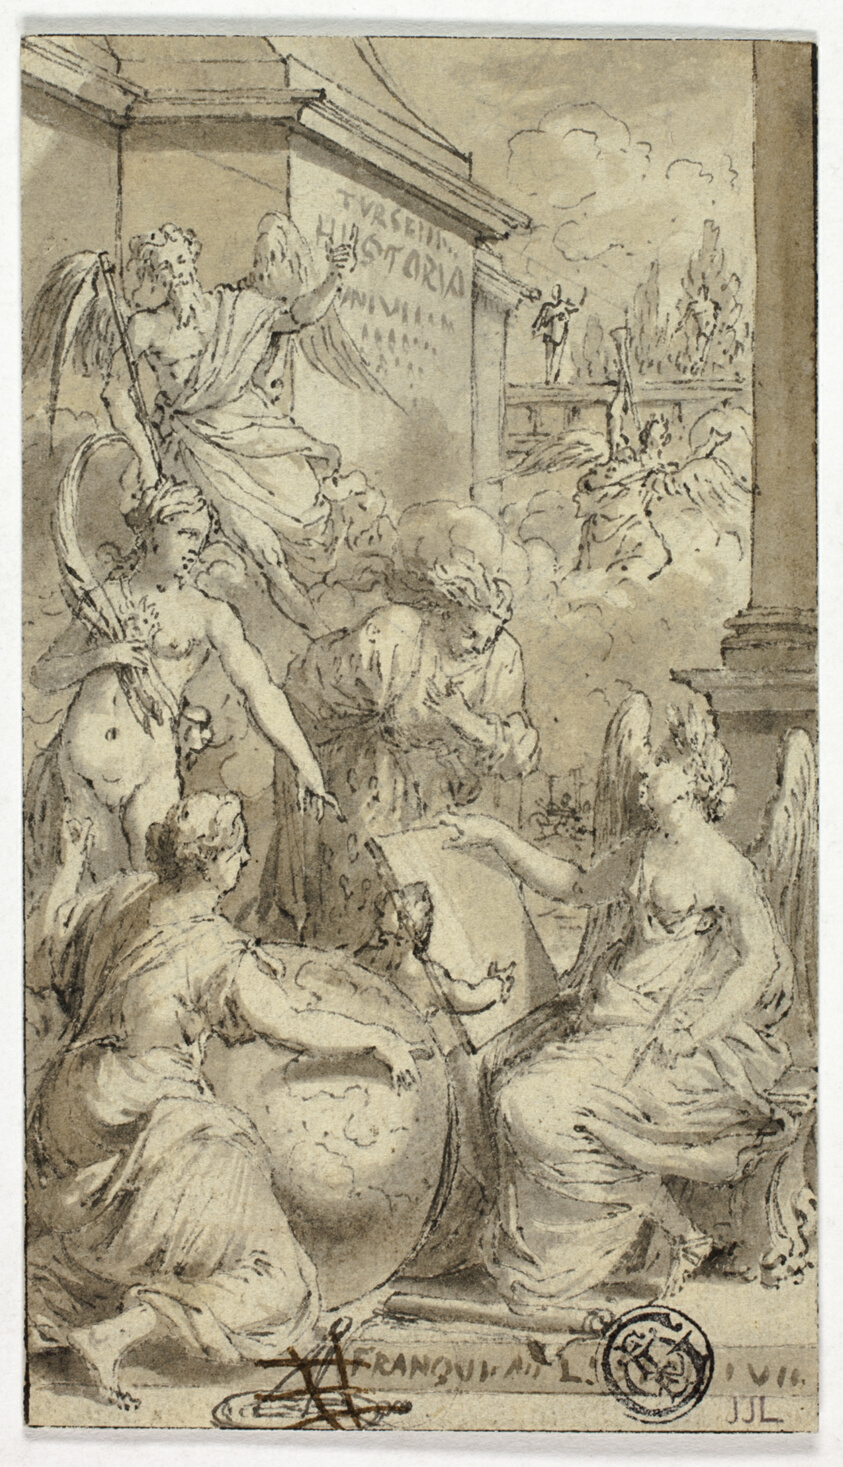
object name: Drawing and Watercolor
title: Allegory of History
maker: Unknown Artist; French or Dutch, 1700-1799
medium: Pen and black ink with brush and brown wash, over traces of graphite, on ivory laid paper, laid down on ivory laid paper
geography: France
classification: pen and ink drawings; drawings (visual works); prints and drawing